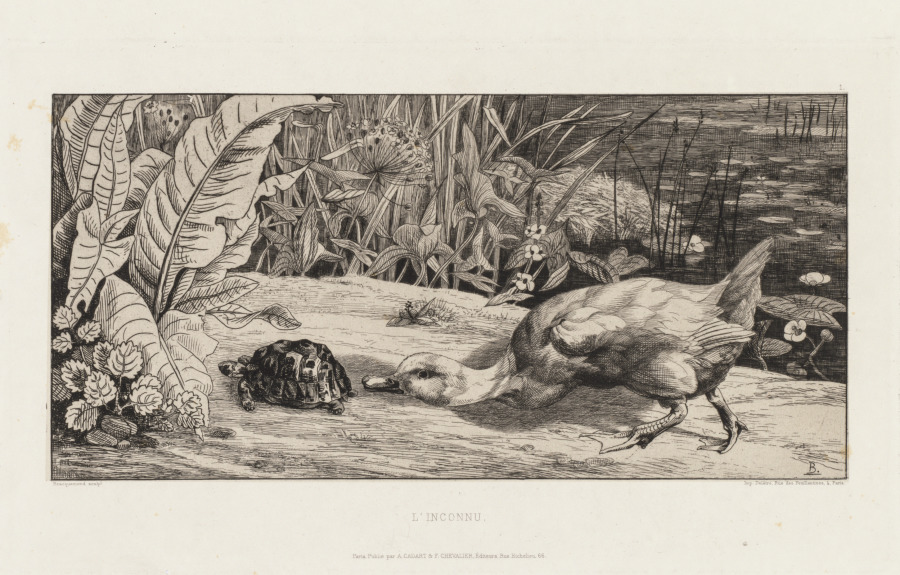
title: The Unknown (L'Inconnu)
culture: France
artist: Félix Bracquemond (French, 1833–1914)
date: 1862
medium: etching and drypoint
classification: Print